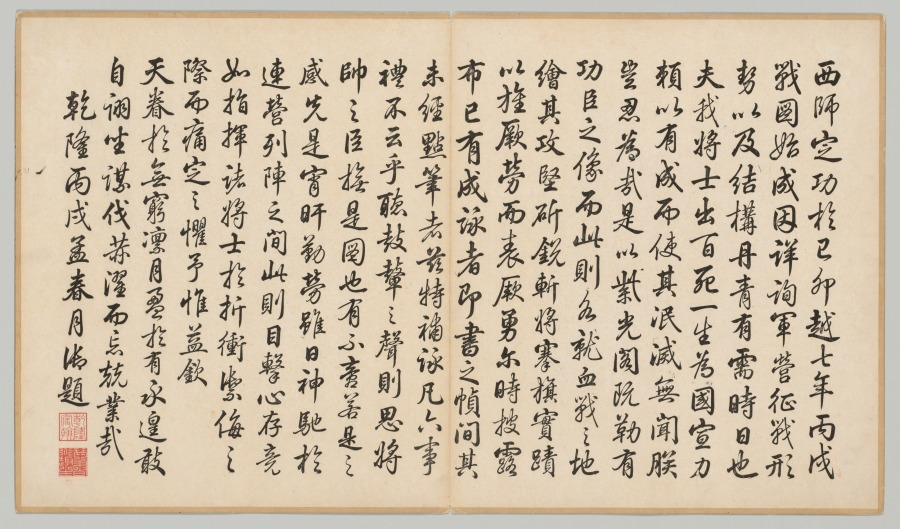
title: Battle Scenes of the Quelling of Rebellions in the Western Regions, with Imperial Poems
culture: China, Qing dynasty (1644–1911), Qianlong reign (1736–95)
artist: Giuseppe Castiglione (Italian, 1688–1766)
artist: Jean Damascene Sallusti (Italian, d. 1781)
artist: Jean Denis Attiret (French, 1702–1768)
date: c. 1765–74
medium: Etchings, mounted in album form, 16 leaves plus two additional leaves of inscriptions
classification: Print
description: This set of etchings was commissioned by Emperor Qianlong to record in pictorial terms the courage of his generals and soldiers in quelling the rebellions in the Western Regions. Qianlong added his own poem to each of the etchings, indicating his appreciation and pride in this demonstration of military might. "Western Regions" refers to the present-day Xingjiang province, often described in Western writing as "Central Asia."